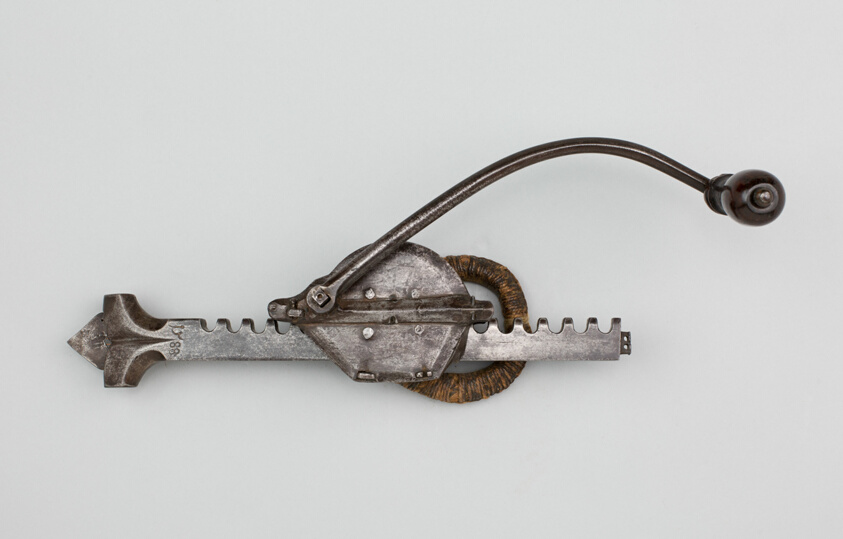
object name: Arms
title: Cranequin (Winder) for a Crossbow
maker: German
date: 1588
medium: Steel and wood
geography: Germany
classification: crossbow; arms; arms and armor